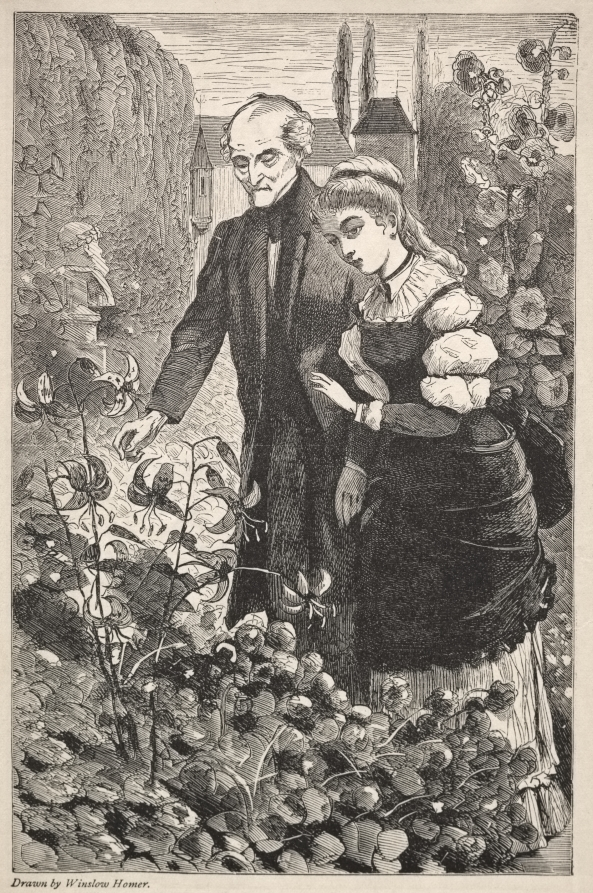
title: "I Call them my Children - To Myself, Susan."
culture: America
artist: Winslow Homer (American, 1836–1910)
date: 1869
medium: wood engraving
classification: Print